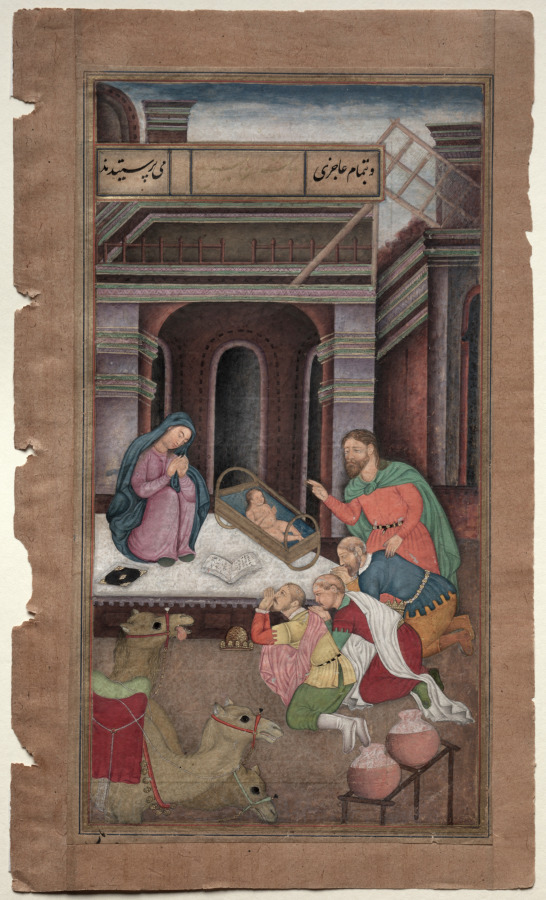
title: The Adoration of the Magi, from a Mirror of Holiness (Mir’at al-quds) of Father Jerome Xavier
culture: Northern India, Uttar Pradesh, Allahabad, Mughal period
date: 1602–4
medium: Gum tempera, ink, and gold on paper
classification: Manuscript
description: In this Nativity scene, familiar in Christian contexts, Mary and Joseph present the infant Jesus to the three Magi, who have placed their crowns on the ground in homage to the King of Kings. The three Magi are portrayed in Portuguese costumes to indicate to a Mughal audience that they are foreigners who believed in Christ. The artist cleverly and humorously indicates that the Magi have just arrived in Bethlehem by depicting their three camels in the bottom corner. One exhausted camel’s tongue hangs out the side of his mouth, while the other two animals lean eagerly toward a pair of water jugs.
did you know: The books next to newborn Jesus indicate that his birth fulfills a prophecy.